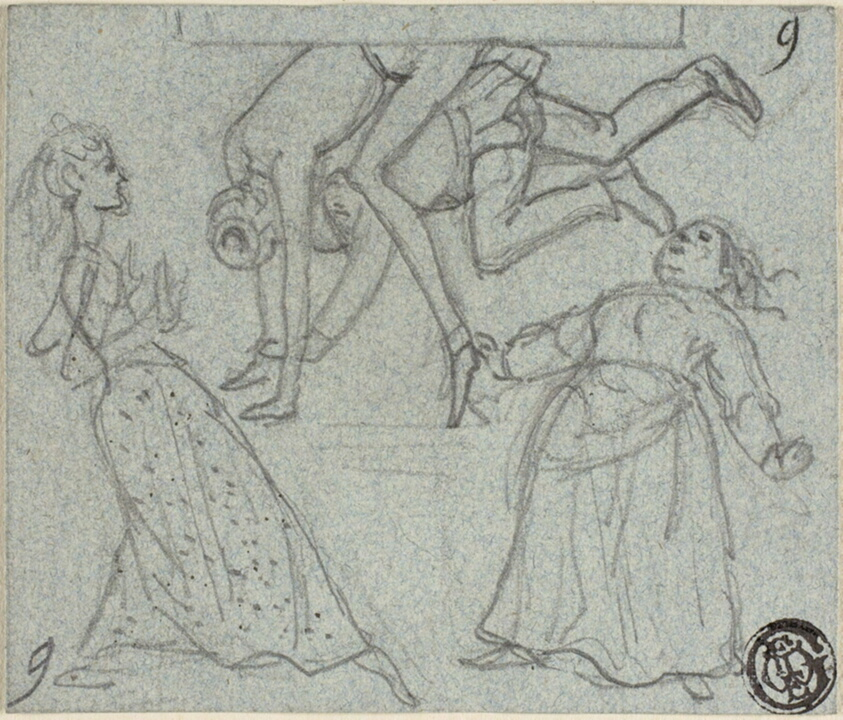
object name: Drawing and Watercolor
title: Episodes from White Chapel Life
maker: Attributed to John Leech; English, 1817-1864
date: c. 1850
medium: Graphite on blue wove paper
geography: England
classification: graphite; drawings (visual works); prints and drawing